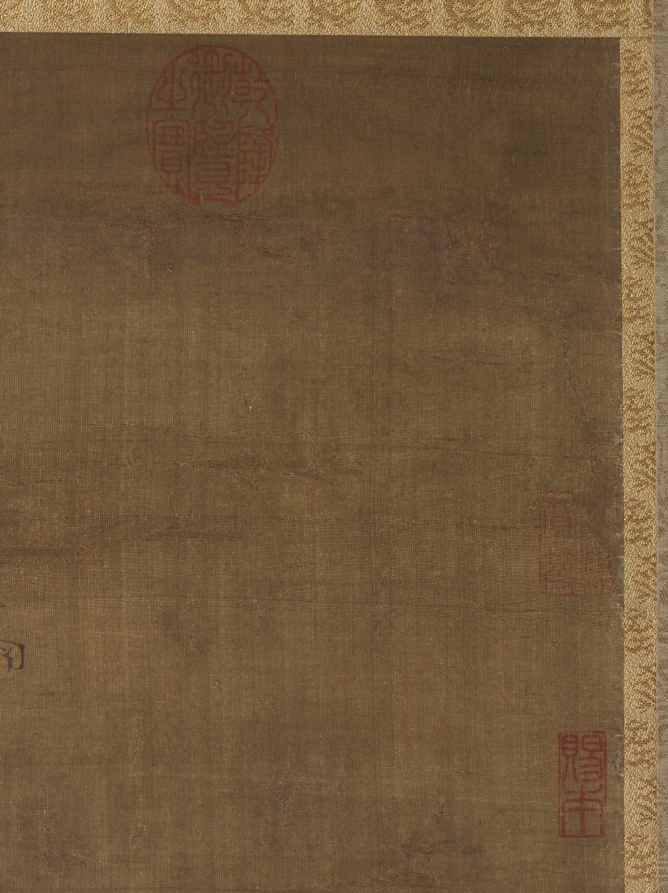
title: A Prunus in the Moonlight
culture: China, Yuan dynasty (1271-1368)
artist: Wang Mian (Chinese, 1287–1359)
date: 1300s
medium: Hanging scroll; ink on silk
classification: Painting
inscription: 8 additional seals: 6 of the Qianlong 乾隆 emperor (r. 1736-95); 2 of Dong Gao 董誥 (1740-1818).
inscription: 海雲初破月團團，獨鶴高飛夜未殘。/ 一片笙簫湖水上，玉妃含笑倚闌干。 王元章作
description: The plum flourishes in the mild climate of the south, and it was not before the Six Dynasties period (220– 589 CE) that the motif began to be appreciated by southern artists, many of whom had emigrated from the north. Wang Mian from Zhejiang province had failed the civil and military service examinations and later rejected appointments under the Mongol government. Instead, he chose to return home, making a living by selling plum paintings. Few of Wang’s works have survived, but they demonstrate that by his time the ink-plum (momei) genre was fully developed.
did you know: The painting portrays the plum in the nighttime, as indicated by the tint of the background and the presence of the moon.